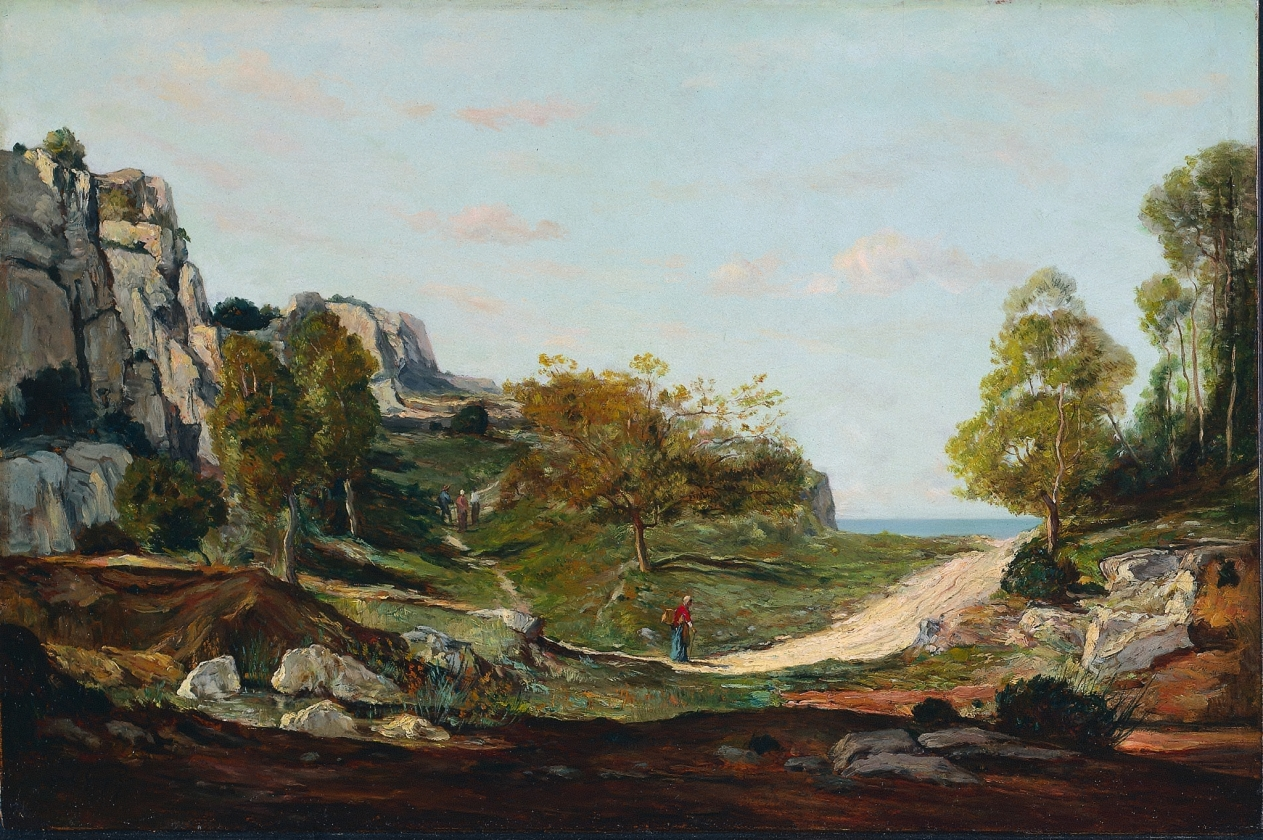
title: Landscape at Saint-André, Near Marseilles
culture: France, 19th century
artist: Paul Guigou (French, 1834–1871)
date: c. 1865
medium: oil on wood panel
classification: Painting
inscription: Signed lower left: Paul Guigou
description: This view of a rocky landscape along the Mediterranean coast of southern France reflects the naturalist ambition of capturing exact details and atmospheric effects observed directly from life. Clear, intense light floods over the stony cliffs and the sparse greenery baked in the heat of sun. The artist, l Guigou, studied art in Marseilles and devoted most of his career to painting views of his native Provence. In 1855 he began traveling back and forth between Marseilles and Paris, where he became familiar with the paintings of Gustave Courbet and died of a stroke at age 37.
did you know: Guigou was once the drawing master for the children of Baron Nathaniel de Rothschild.